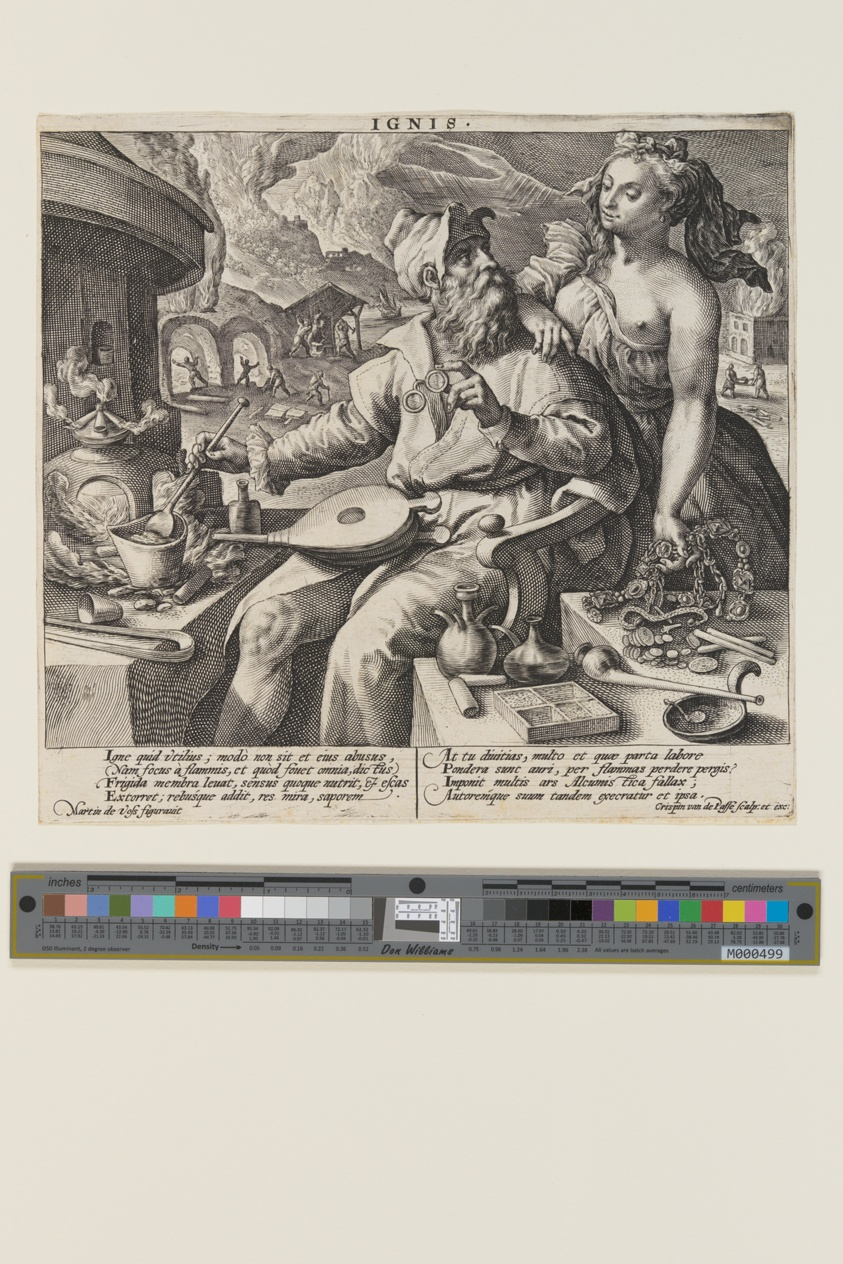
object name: Print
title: Ignis (Fire), from The Elements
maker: Crispijn van de Passe I (Dutch, c. 1565–1637); after Maerten de Vos Maarten de Vos (Flemish, 1532–1603)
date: c. 1600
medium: Engraving on ivory laid paper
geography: Netherlands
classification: engraving; paper; print; prints and drawing